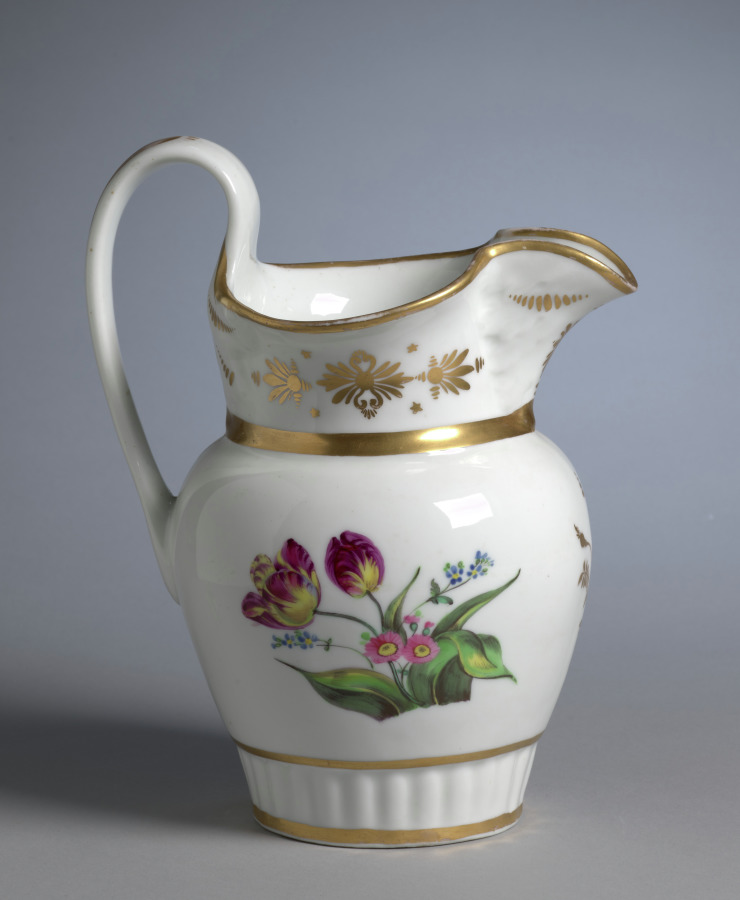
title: Pitcher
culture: America, Pennsylvania, Philadelphia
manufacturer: Tucker Factory (American)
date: c. 1830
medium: porcelain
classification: Ceramic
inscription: bears tape on bottom inscribed: Josephine Wood [Price?] / this belongs to [---] / Wood.